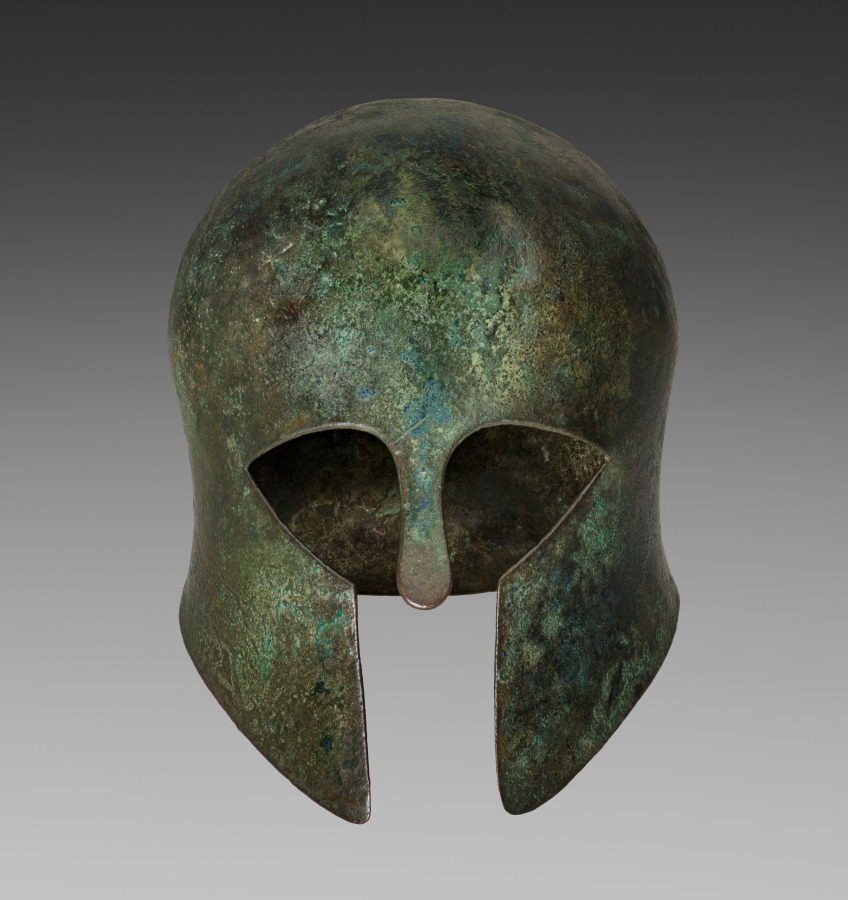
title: Corinthian Helmet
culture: Greek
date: c. 625–550 BCE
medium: Bronze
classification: Arms and Armor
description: This remarkably well-preserved bronze helmet belongs to an iconic type known as Corinthian yet produced far beyond the city of Corinth. Designed for use by hoplite warriors, who fought with spears and shields in shoulder-to-shoulder (phalanx) formation, such helmets provide maximum protection but limited vision, hearing, and movement. Probably first cast and then hammered into its final shape, the helmet features both gentle curves and sharp angles, evoking the head and face that it protected. Similar helmets appear frequently on warriors shown in ancient art, though often with crests of horsehair or other organic materials that no longer survive.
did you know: A small hole above the rear neckline, now repaired, may reflect a fatal blow.